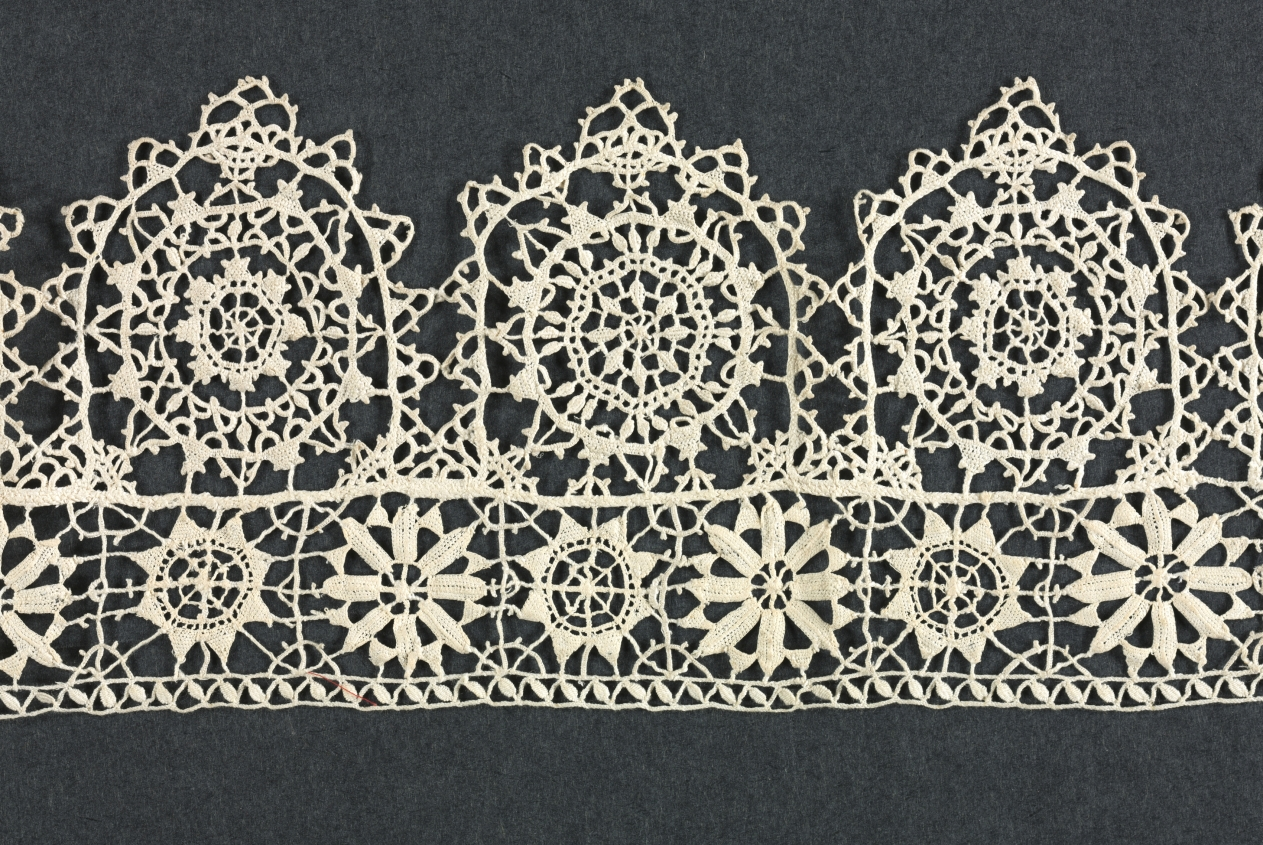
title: Lace Fragment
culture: Italy, Genoa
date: 1550–99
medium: Needle lace (reticella) insertion and edging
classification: Lace